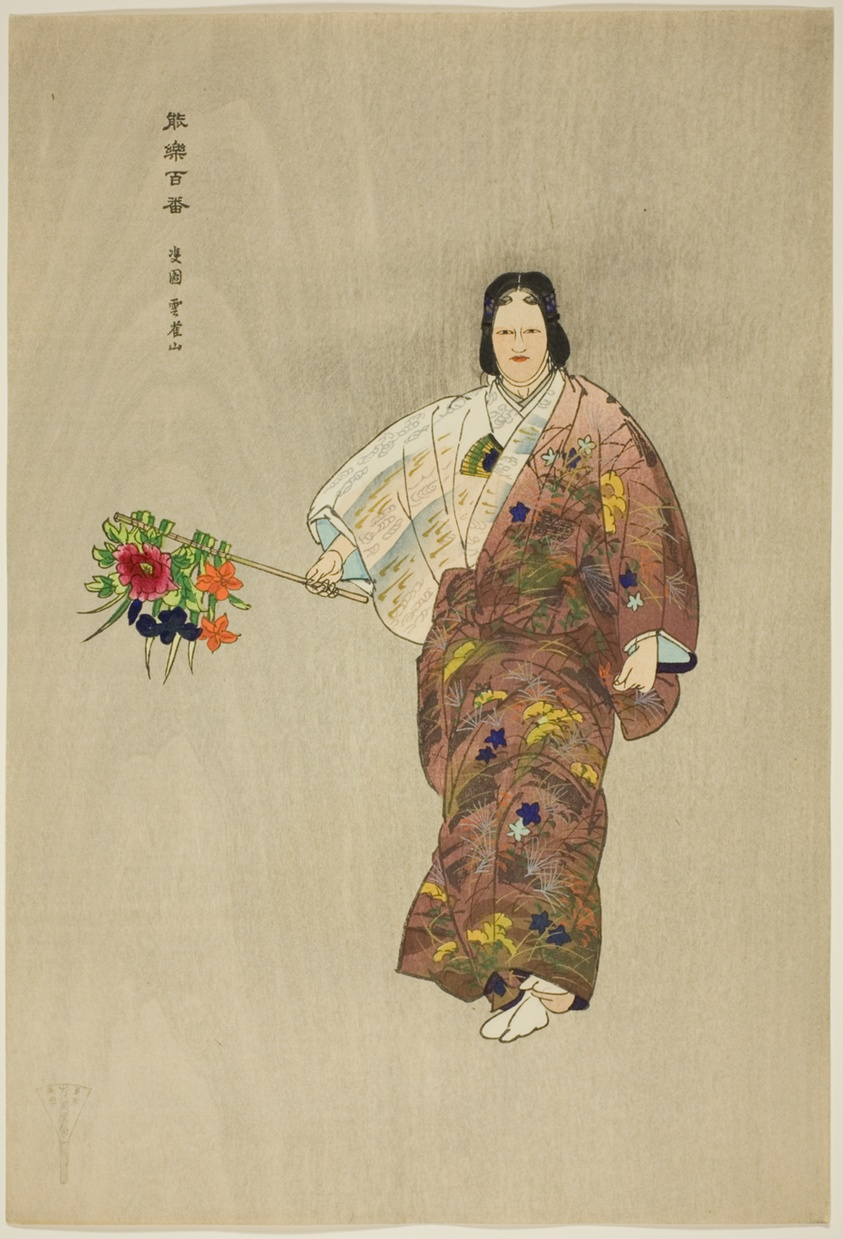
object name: Print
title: Hibari-yama, from the series "One Hundred No Dramas (Nogaku hyakuban)"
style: Japanese (culture or style)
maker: Tsukioka Kogyo; Japanese, 1869-1927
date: 1898/1903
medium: Color woodblock print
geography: Japan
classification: woodblock print; print; asian art